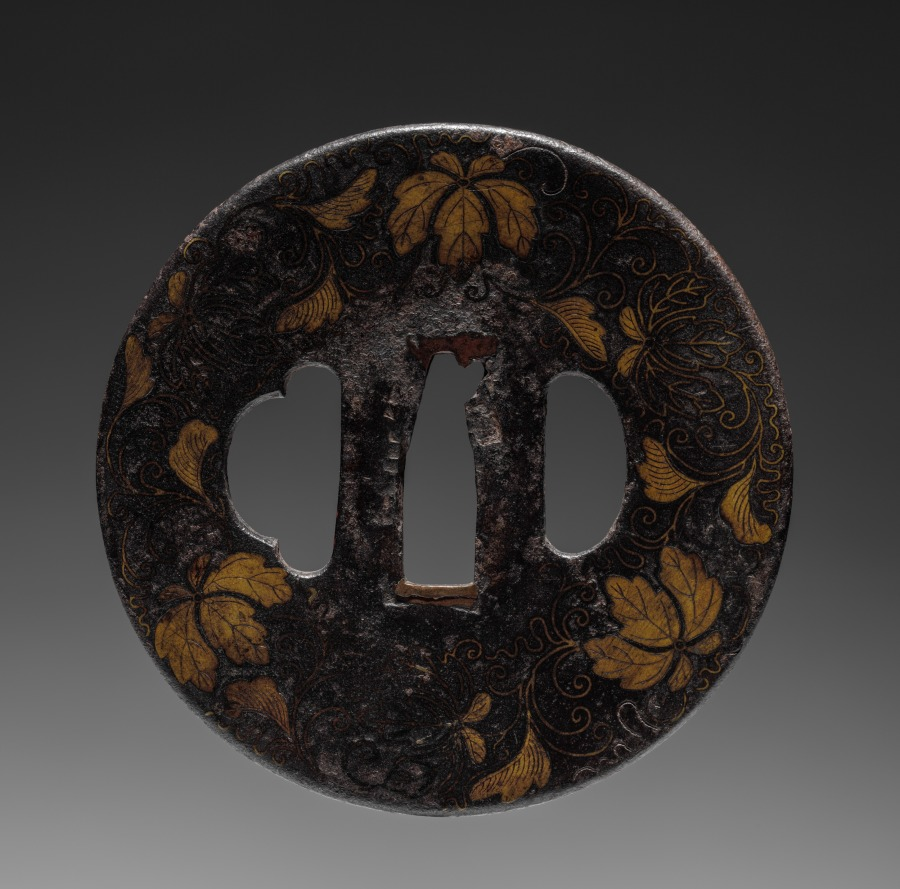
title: Sword Guard (Tsuba)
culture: Japan, possibly Edo period (1615-1868)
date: c. 1615–1868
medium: iron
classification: Arms and Armor